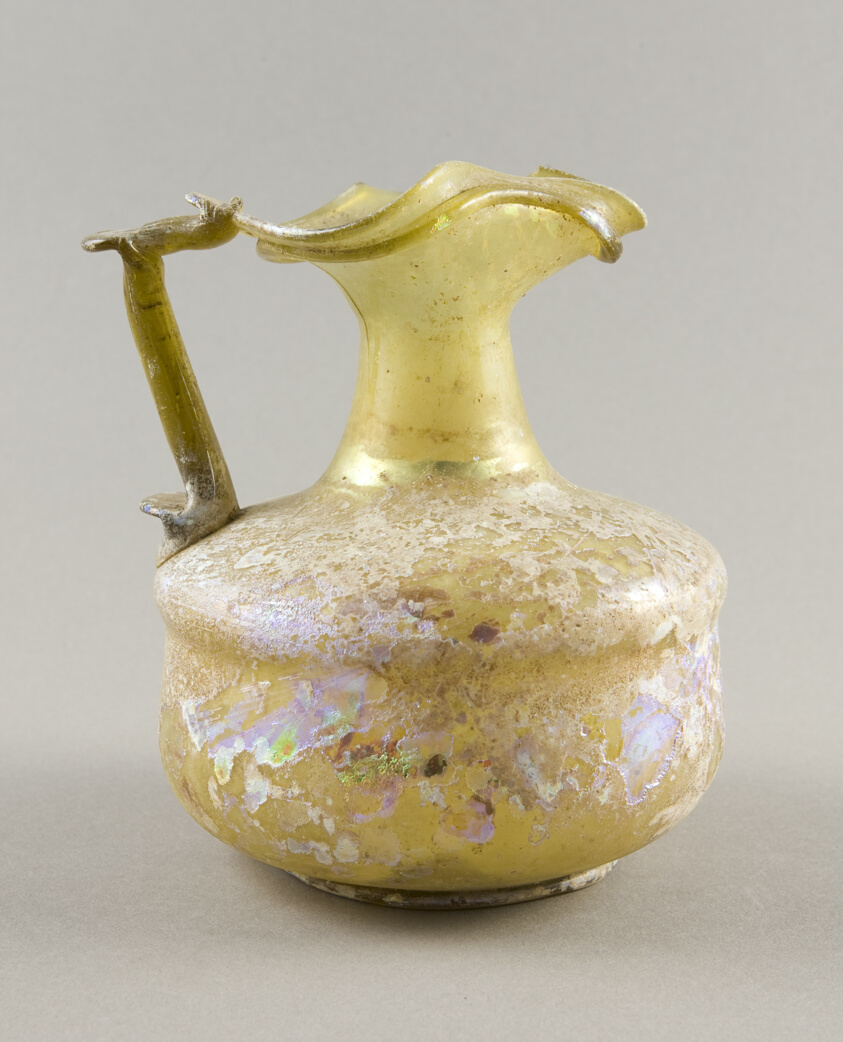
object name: Vessel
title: Flask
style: syrian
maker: Roman; Levant or Syria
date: 3rd-4th century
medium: Glass, blown technique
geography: Syria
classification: glass; vessel; ancient art